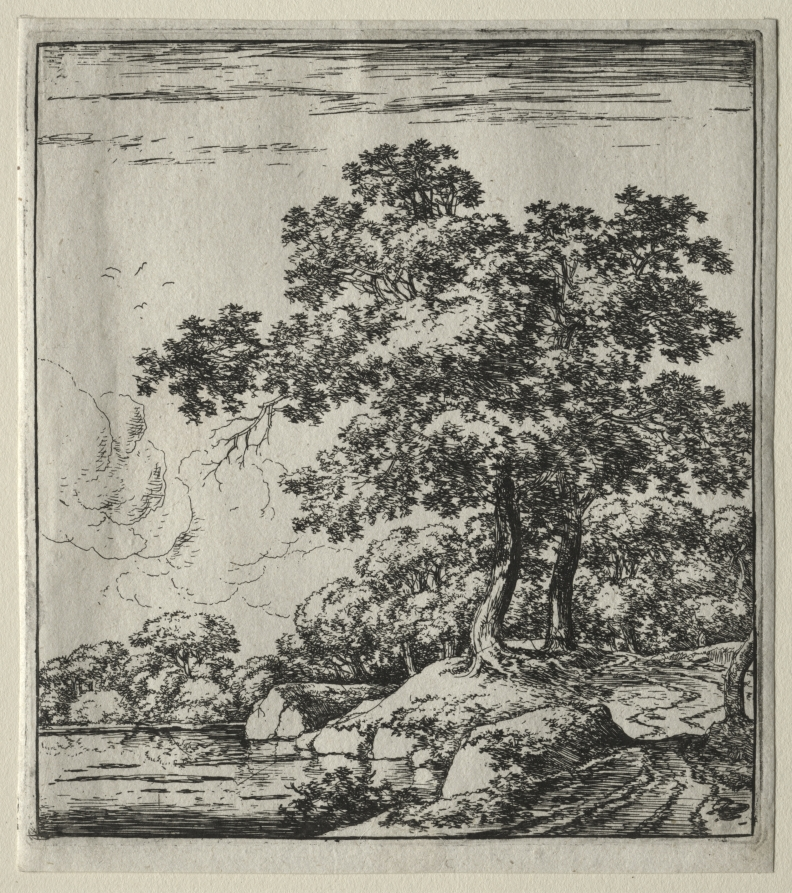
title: Les deux grands arbres près de la rivière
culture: Flanders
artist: Herman Naiwincx (Flemish, c. 1624–after 1651)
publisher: Clement de Jonghe (Dutch, 1579–1679)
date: 1640–51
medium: engraving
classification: Print